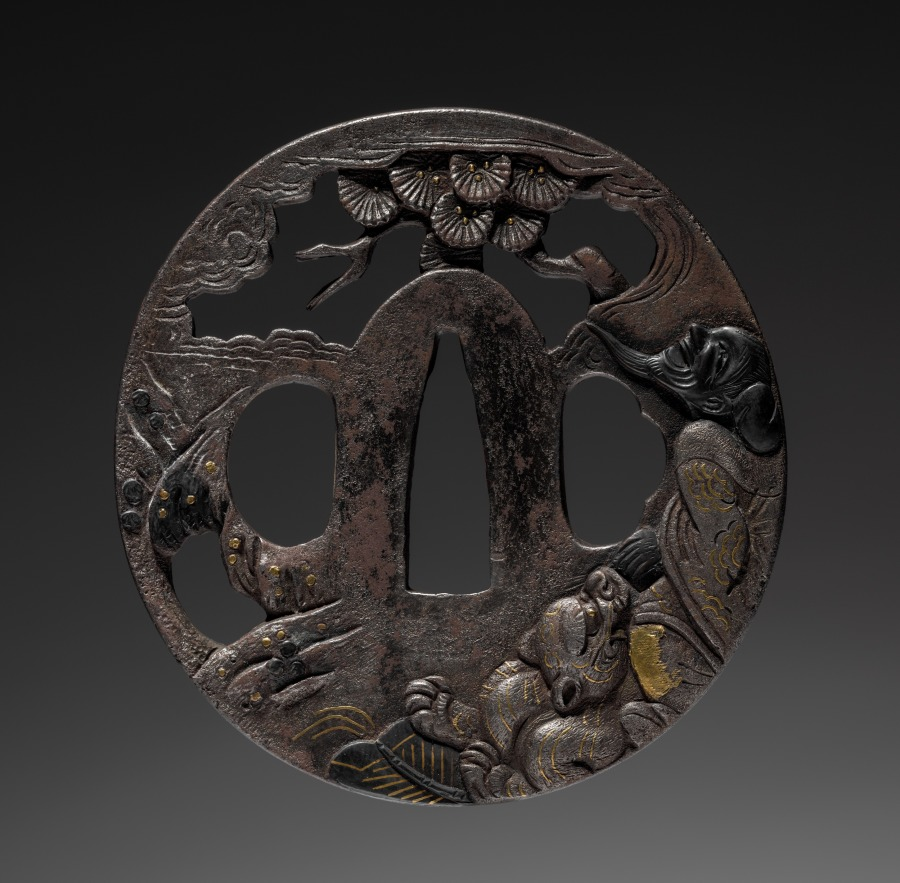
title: Sword Guard (Tsuba) with Chinese Immortal and Tiger Under Pine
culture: Japan, Edo period (1615–1868)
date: 1700s-1868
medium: iron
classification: Arms and Armor